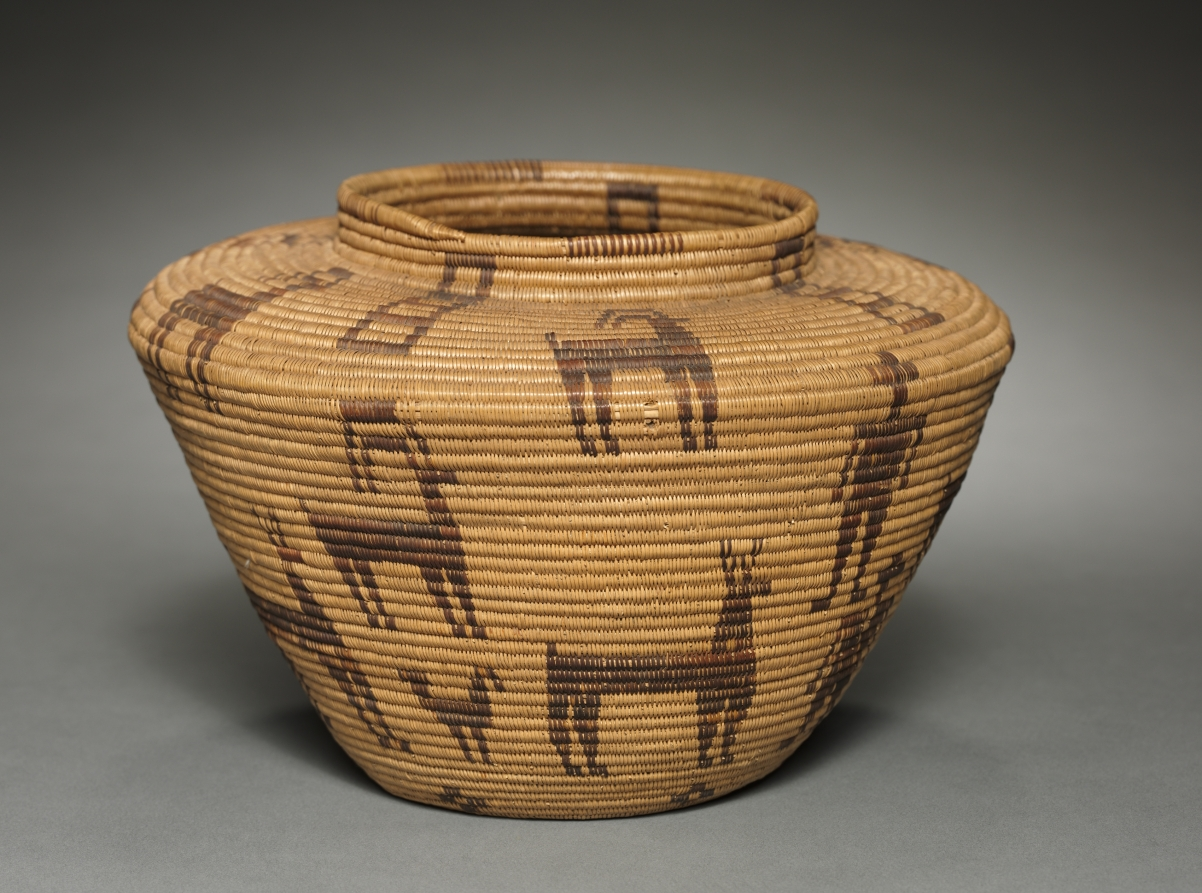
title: Jar-shaped Basket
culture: Native North America, Great Basin, California, Death Valley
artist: Sarah Hunter (Timbisha Shoshone (Panamint), 1883–1967)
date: 1910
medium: Willow, bulrush; coiled (3 rods)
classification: Basketry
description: Sarah Hunter’s basketry is noted for geometricized motifs reminiscent of the animals depicted in petroglyphs on canyon walls in the Death Valley region. Here they include pronghorn mountain sheep, deer, and birds, along with humans, all created in light-brown bulrush against a honey-colored willow ground. Traditional Indigenous basket weavers, who have exhaustive knowledge of the plant world, tend, harvest, and prepare their own materials. If stages of the process are not done properly and at the right time, color will be uneven and stitches will twist and split.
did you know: Some Timbisha Shoshone women continue traditions of basket weaving to the present day.